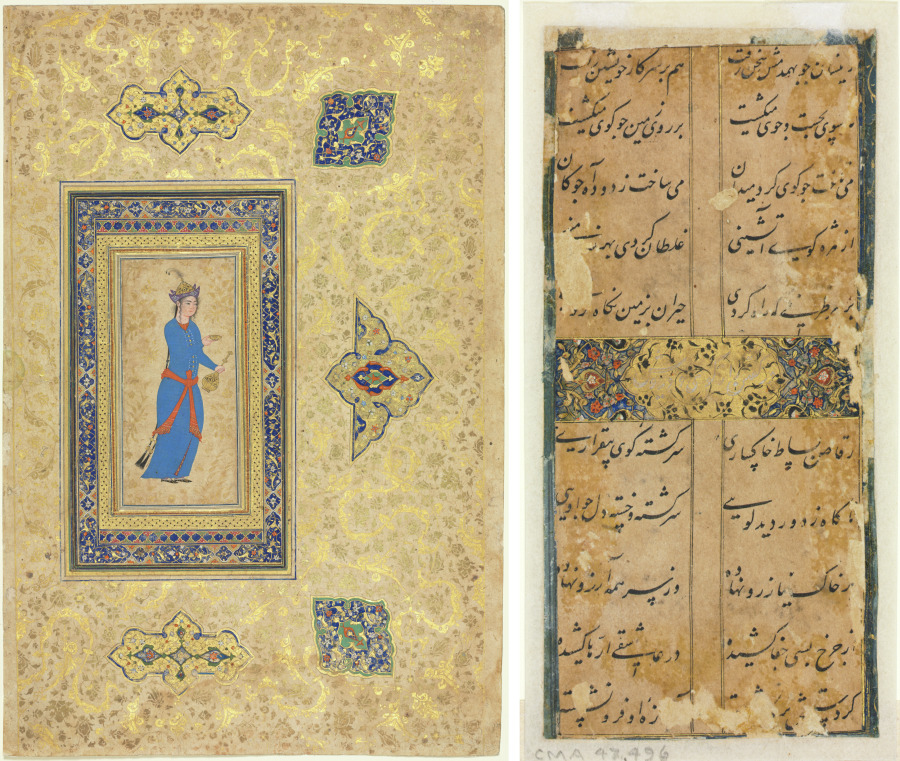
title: Princess with Wine Bottle and Cup (recto); Persian Verses (verso)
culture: Iran, Qazvin or Isfahan, Safavid period (1501-1722) (recto); Iran, possibly Timurid period (1370-1501) (verso)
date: c. 1550–1600 (recto); c. 1450–1500 (verso)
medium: opaque watercolor, ink, and gold on paper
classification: Manuscript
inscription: verso script: Nasta'liq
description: Single-page depictions of courtly figures became popular in Iran during the 1500s. The subject here conveys Safavid ideals of female beauty. Long dark hair falls in jeweled braids down to her ankles, while shorter tendrils frame her full, smooth face. She is shown in the three-quarter profile favored in Persian painting. The contrasting colors of the bright blue of her robe and the orange of her sash and tunic beneath are features of Safavid fashion.